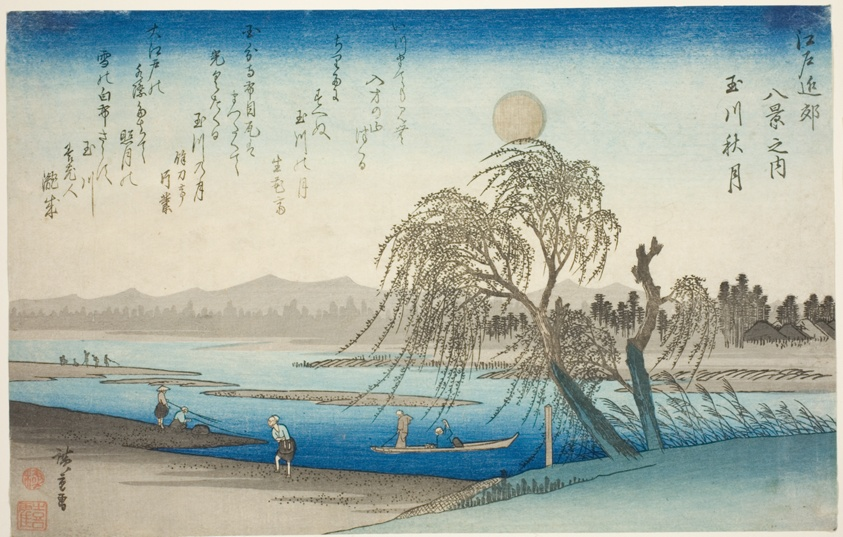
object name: Print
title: Autumn Moon over Tama River (Tamagawa no shugetsu), from the series "Eight Views in the Environs of Edo (Edo kinko hakkei no uchi)"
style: Japanese (culture or style)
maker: Utagawa Hiroshige 歌川 広重; Japanese, 1797-1858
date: c. 1837/38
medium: Color woodblock print; oban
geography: Japan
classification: woodblock print; print; asian art